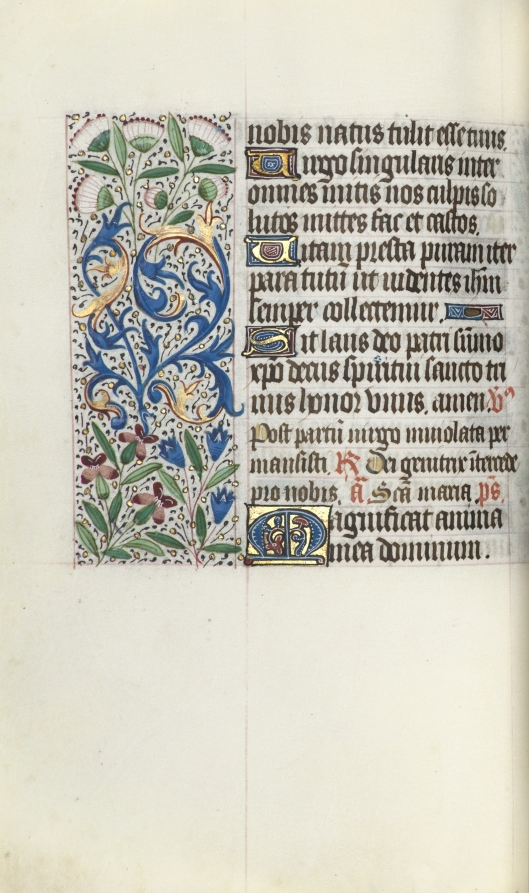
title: Book of Hours (Use of Rouen): fol. 73v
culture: France, Rouen, 15th century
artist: Master of the Geneva Latini (French, active Rouen, 1460–80)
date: c. 1470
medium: ink, tempera, and gold on vellum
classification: Bound Volume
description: In the late 1400s and early 1500s Rouen was an established and important center of book production. The city’s cathedral had a wealthy chapter that spent large sums of money to commission books and to maintain its extensive library. The stationers and booksellers would have likely been concentrated in or near the cathedral precinct. This artist, named after a manuscript now in Geneva, was Rouen’s principal illuminator during the second half of the 1400s.